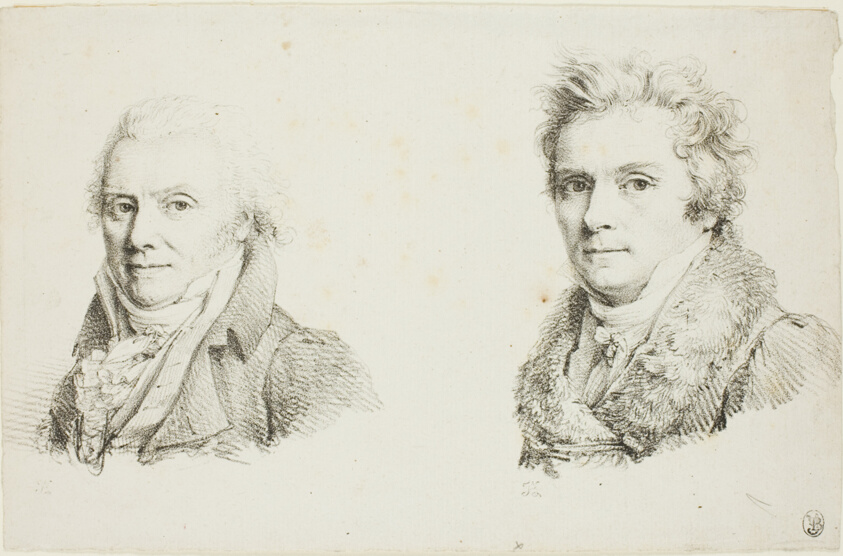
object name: Print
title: Self-Portrait in a Dark Cloth Coat and Self-Portrait in a Fur-Collared Coat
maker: Jean Antoine Laurent (French, 1763-1832); printed by Comte de Charles Philibert Lasteyrie du Saillant (French, 1759-1849)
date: c. 1817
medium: Two lithographs in black from two stones on ivory laid paper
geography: France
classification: lithograph; print; prints and drawing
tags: portraits